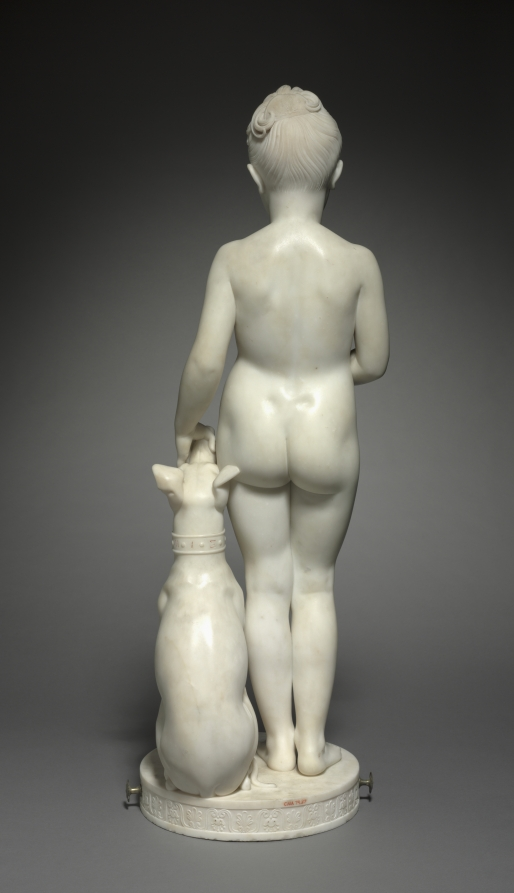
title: Portrait of Napoléone Elisa Baciocchi, Niece of Napoleon I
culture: Italy, 19th century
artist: Lorenzo Bartolini (Italian, 1777–1850)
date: 1810–12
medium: marble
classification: Sculpture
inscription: inscribed in Greek on dog's collar: ARTEMIS (letters originally filled with red pigment)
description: To extend power across the continent, Napoleon arranged for his sisters to marry into the courts of Europe. The sitter is his niece, daughter of the Grand-Duke of Tuscany (the bee on her cup is a Napoleonic emblem). While the girl’s nakedness might startle us today, in the early 1800s depicting children nude emphasized their purity and innocence. The work takes its cues from ancient sculpture, and while the pet dog adds a note of tenderness, it also refers to Diana, goddess of the moon and hunt.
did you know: Felice Pasquale Baciocchi, the father of the subject of this sculpture, was an avid violinist and studied with violin virtuoso Niccolò Paganini for a decade.